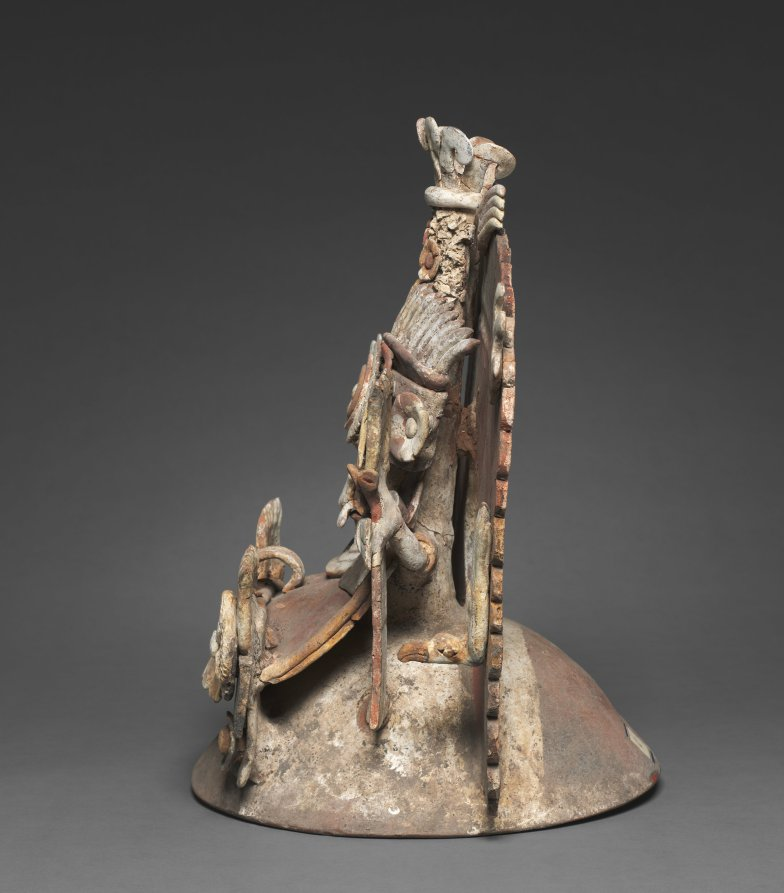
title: Incense-burner Cover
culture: Guatemala, Escuintla Region, early 6th Century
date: c. 500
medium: earthenware with slip and pigments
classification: Ceramic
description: This elaborate clay construction served as the cover and chimney of a basin used to burn copal incense. Although probably manufactured in what is now Guatemala, the form and fabrication are based on examples from Teotihuacan in central Mexico, hundreds of miles away. Intensive trade between the two regions, or even a Teotihuacan colony in Guatemala seems likely. The masked, dressed, and ornamented moundlike form probably represents a mortuary bundle or a cult image.